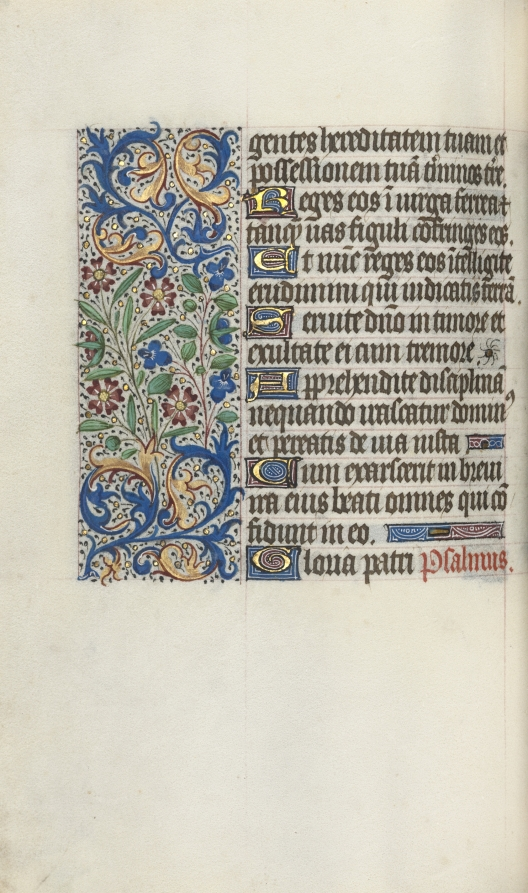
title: Book of Hours (Use of Rouen): fol. 58v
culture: France, Rouen, 15th century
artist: Master of the Geneva Latini (French, active Rouen, 1460–80)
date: c. 1470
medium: ink, tempera, and gold on vellum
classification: Bound Volume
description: In the late 1400s and early 1500s Rouen was an established and important center of book production. The city’s cathedral had a wealthy chapter that spent large sums of money to commission books and to maintain its extensive library. The stationers and booksellers would have likely been concentrated in or near the cathedral precinct. This artist, named after a manuscript now in Geneva, was Rouen’s principal illuminator during the second half of the 1400s.